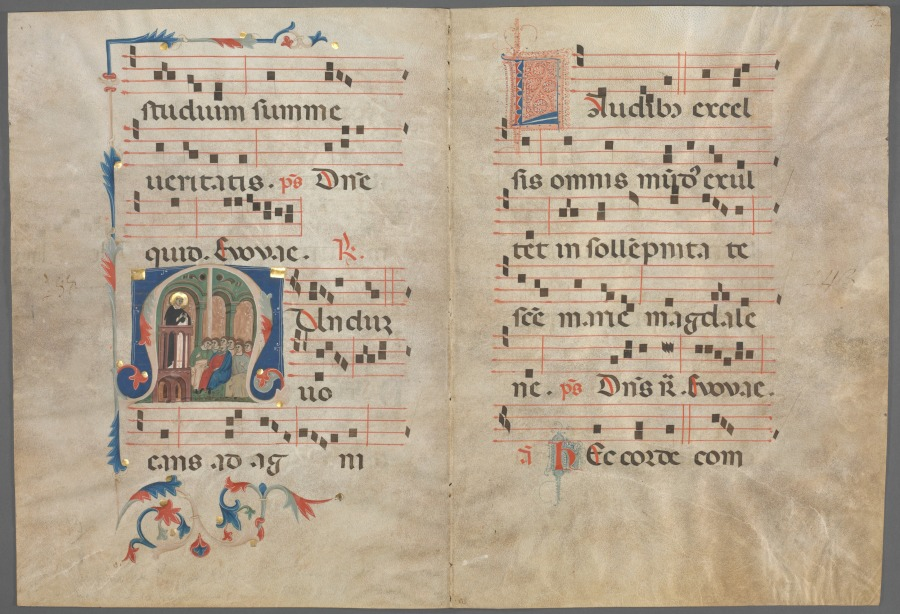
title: Bifolium from an Antiphonary: Initial M with Saint Dominic Preaching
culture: Italy, Bologna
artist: Primo Miniatore di San Domenico (Italian)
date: c. 1320–40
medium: ink, tempera, and gold on parchment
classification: Manuscript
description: The representation of Saint Dominic (1170–1221), founder of the Dominican Order of Preachers, in this initial suggests that this double page was at one time part of a manuscript made for a Dominican convent. Saint Dominic traveled much, preaching throughout Europe, and was particularly venerated in Bologna, the city in which he died and was buried. The illuminator of this initial is named after a volume he decorated of Seneca’s works (now in the Bibliothèque nationale in Paris). His workshop specialized in large-scale manuscripts destined for wealthy religious institutions in the region of Emilia, for which Bologna was the artistic and intellectual center.